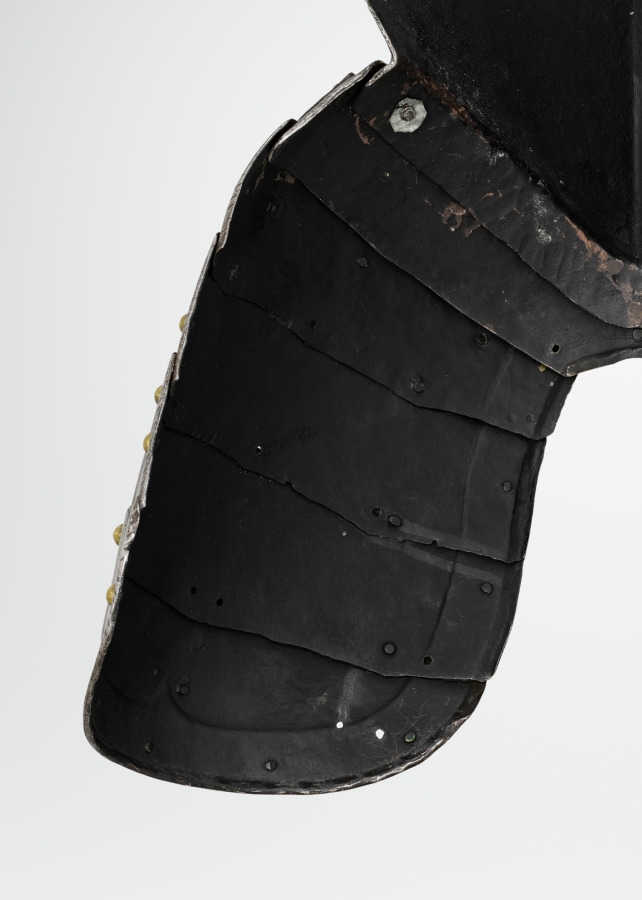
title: Tasset (proper left)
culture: South Germany, 16th century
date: c. 1560–1580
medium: steel, leather straps, brass rivets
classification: Arms and Armor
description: This armor was developed for the joust-a sporting combat between two mounted contestants. Although all of the elements of this armor date from the same period, they are not all from the same suit. This armor is thus called "composed." It also shows the asymmetry of jousting armor. The participants rode along a wall-like barrier known as a "tilt" with their left sides facing one another. Consequently, armor on that side of the body had to be thicker. Note the large plate (grandguard) over the left shoulder for extra protection. Also, the breathing holes in the helmet were placed on the right side (farthest from an opponent's lance) to avoid injuries from splinters. The bracket attached to the right breastplate is called the lance-rest, a shock-absorbing support designed to accommodate the lance when "couched" under the right armpit.